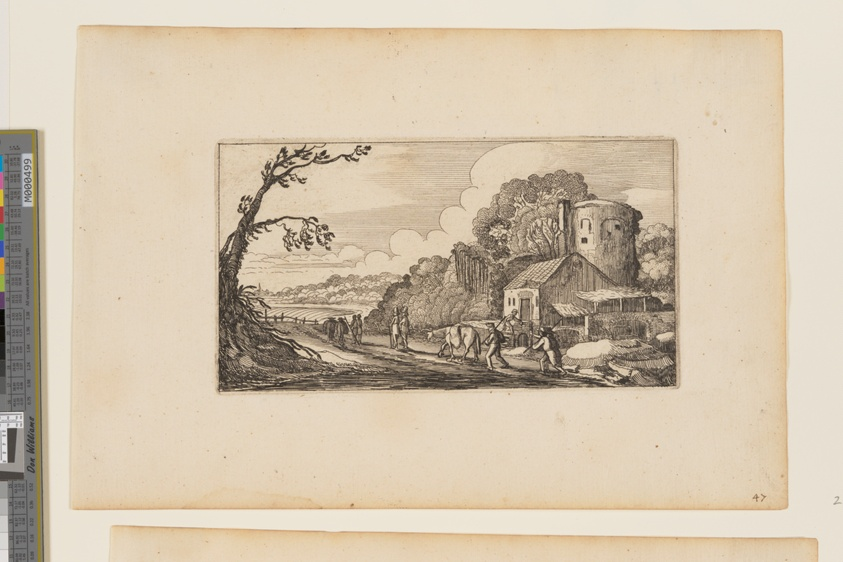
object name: Print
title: Path to Left of a Farm Dominated by a Round Tower, from Twelve landscapes with Figures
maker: After Gillis van Scheyndel; Dutch, 1595–1660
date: 1624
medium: Etching on ivory laid paper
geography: Netherlands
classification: etching; paper; print; prints and drawing